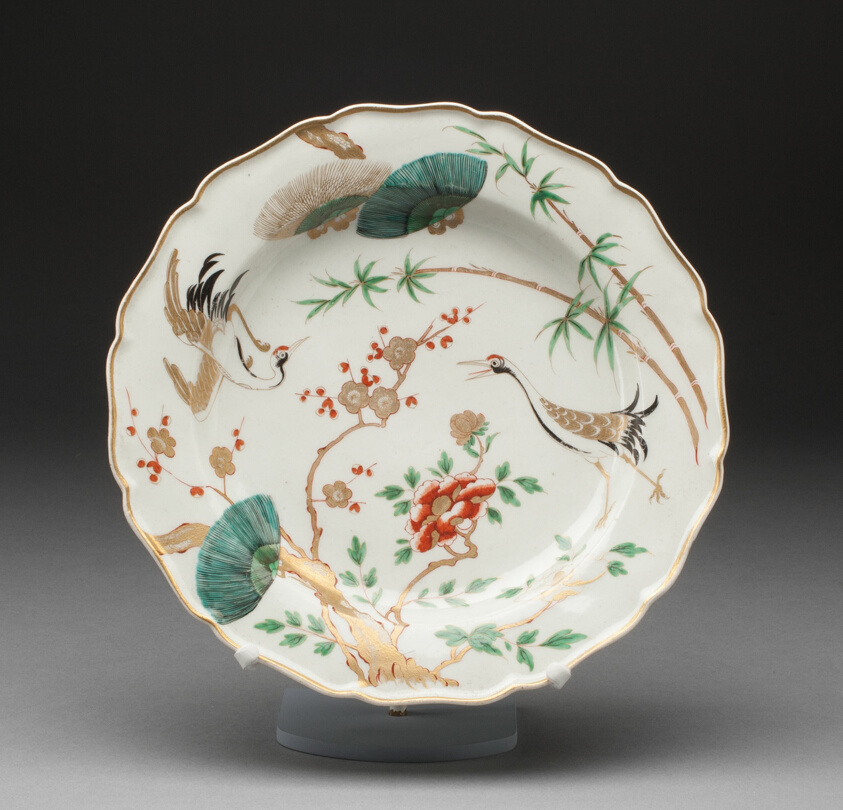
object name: Ceramics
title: Plate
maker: Worcester Porcelain Factory (Warmstry House Period, 1751–1783); Worcester, England, founded 1751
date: c. 1770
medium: Soft-paste porcelain, polychrome enamels and gilding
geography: Worcester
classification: plate (general, dish); dish (vessel); porcelain; european decorative arts; ceramics